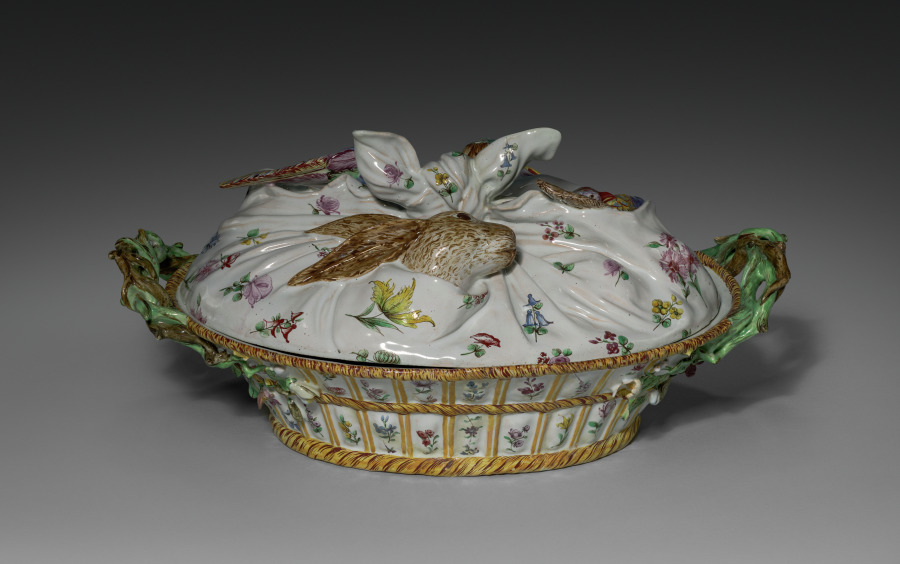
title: Covered Tureen in the Form of a Basket of Game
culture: France, 18th century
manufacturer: Sceaux Factory (French, active 1748–66)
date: c. 1755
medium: Tin- glazed earthenware (faience) wth enamel decoration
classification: Ceramic